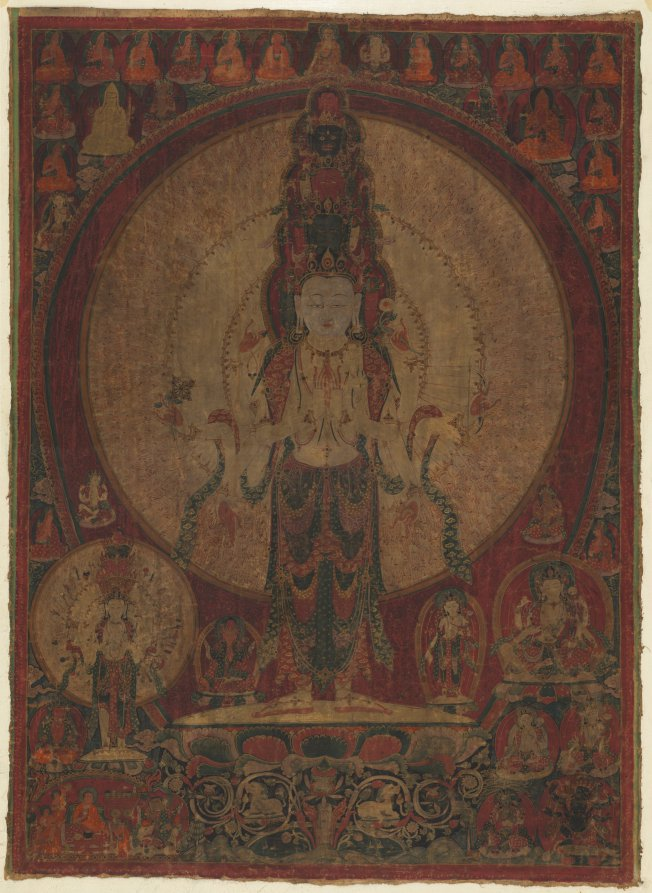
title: Eleven-Headed, Thousand-Armed Bodhisattva of Compassion (Avalokiteshvara)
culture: Western Tibet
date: c. 1500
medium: Gum tempera and ink on cotton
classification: Painting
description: One thousand arms surround the central figure like a radiating halo. Each hand has an eye in the palm to see the suffering of all beings, generating the sense of compassion that this figure embodies. The special form of the central image of the bodhisattva Avalokiteshvara derives from the mystic vision of a nun named Gelongma Palmo, who was born a Kashmiri princess, but prayed for leprosy to avoid having to marry and became an accomplished nun. While meditating in a cave, she achieved this vision of 11-headed, 1,000-armed Avalokiteshvara, who cured her leprosy and guided her on the path to enlightenment.